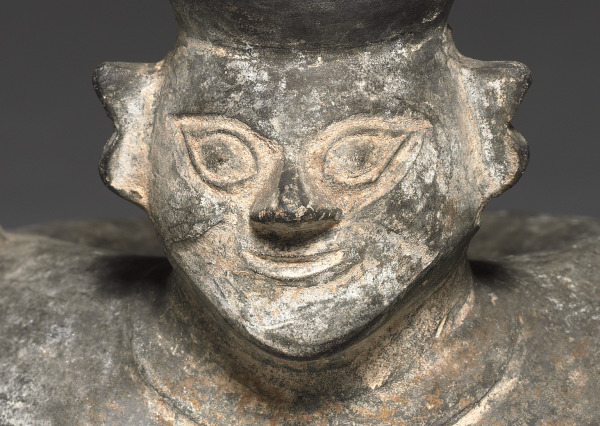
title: Funeral Urn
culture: Peru, Chimú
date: c. 1150–1530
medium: black ware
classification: Ceramic